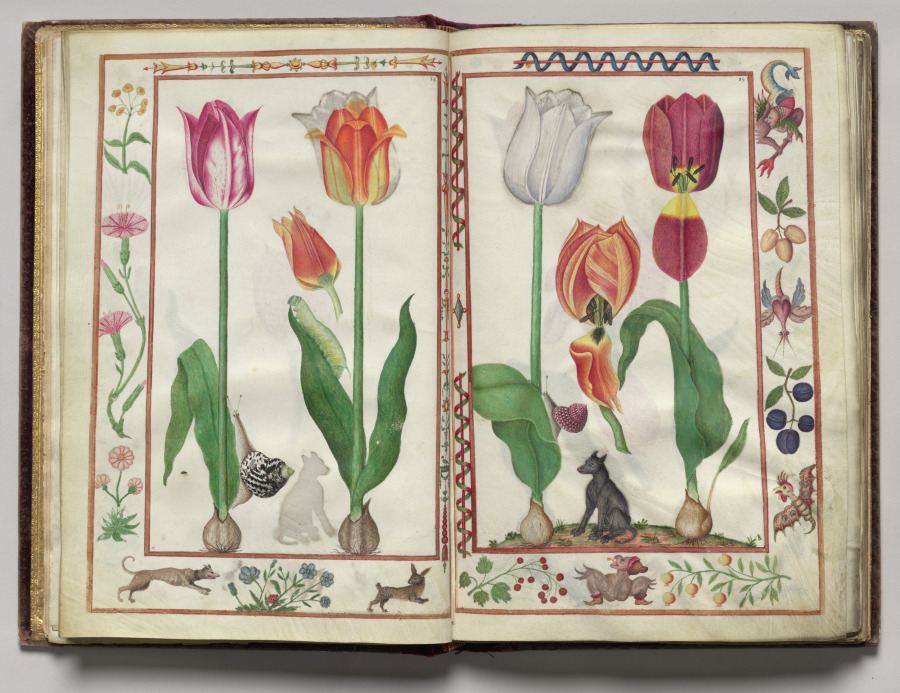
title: Tulips, Snail, and Dog with Hybrid Creature Border, folio 8 (recto), from Florilegium (A Book of Flower Studies)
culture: France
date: 1608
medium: watercolor, ink, silver, and gold over occasional traces of pencil, on vellum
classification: Bound Volume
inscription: Dated: Poitiers 1608 (on frontispiece) Signed: On frontispiece in black ink, lower right: Van Kuyk Notation on drawing: Frontispiece: in pencil, lower margin: * élève de Van Kessel, peintre flammand (* in pencil also appears in front of Van Kuyk's name).